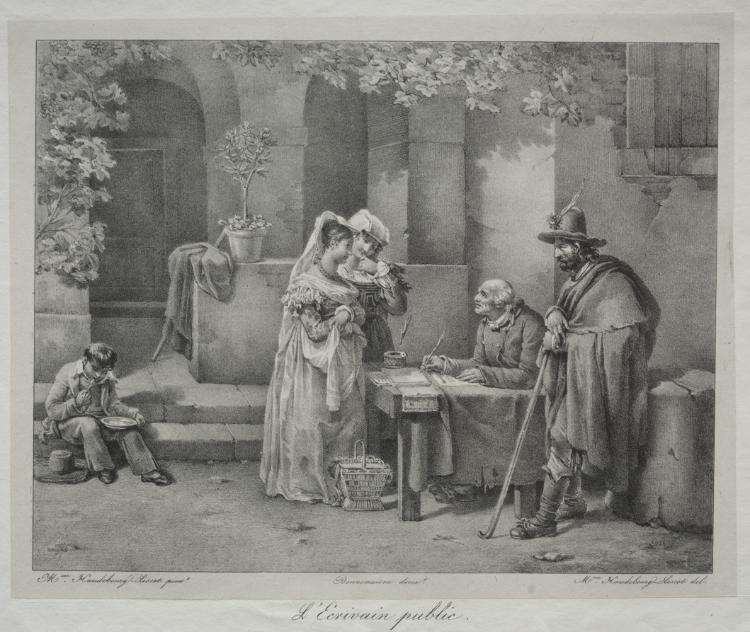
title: The Public Writer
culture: France, 19th century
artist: Antoine Cécile Hortense Haudebourt-Lescot (French, 1784–1845)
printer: Delpech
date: 1825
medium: lithograph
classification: Print